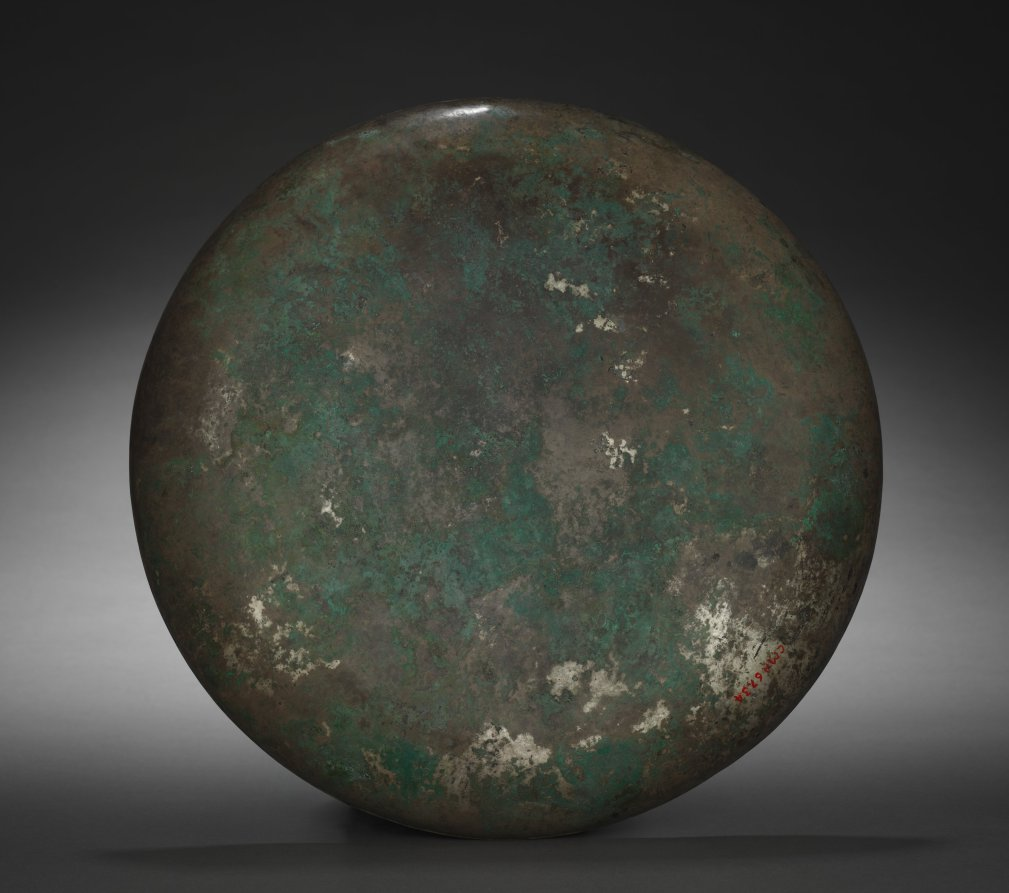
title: Plate with Winged Griffin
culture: Soghdia, Hephtalite period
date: 500s–600s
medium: silver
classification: Silver